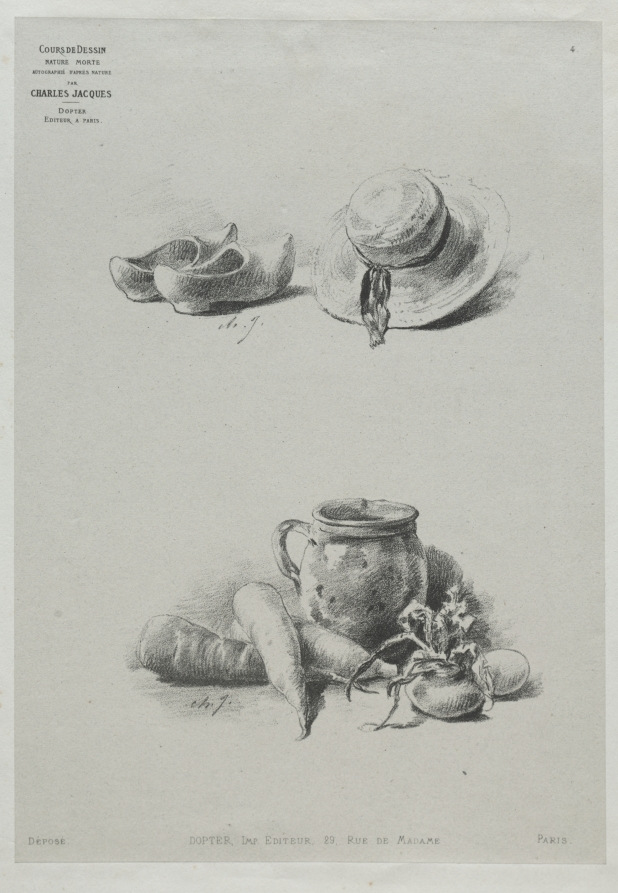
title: Still Life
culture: France, 19th century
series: Drawing Course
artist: Charles-Émile Jacque (French, 1813–1894)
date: c. 1888–94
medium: lithograph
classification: Print